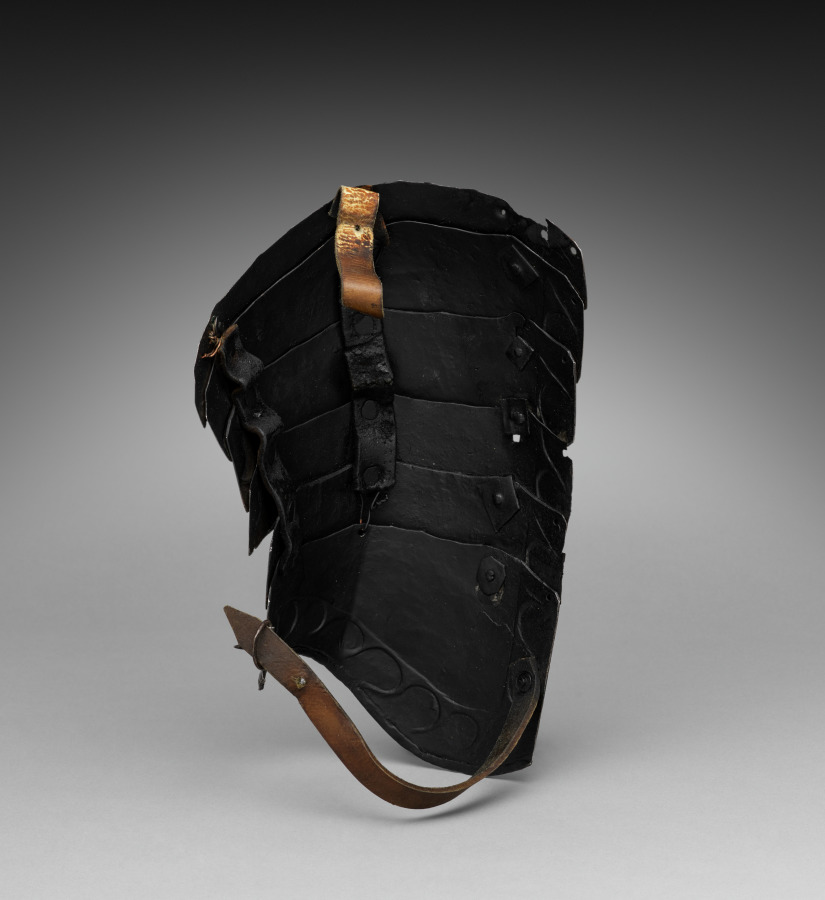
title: Espalier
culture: Germany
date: 1500s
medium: steel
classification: Arms and Armor